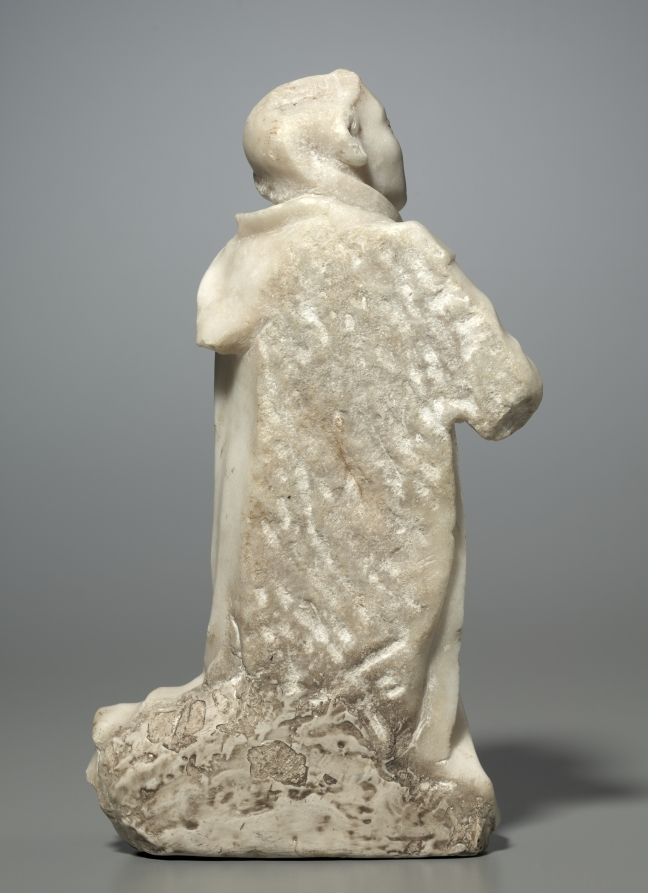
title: Kneeling Carthusian Monk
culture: France, Burgundy, Dijon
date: c. 1380–1400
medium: marble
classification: Sculpture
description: These are the only known surviving sculpted examples of kneeling Carthusian monks. These two figures would have formed part of a private devotional group, probably in a monk’s cell, with a sculpture of the crucified Christ or the Virgin positioned between them. They wear the recognizable white scapular, a hooded garment with front and back panels tied together with a tab.